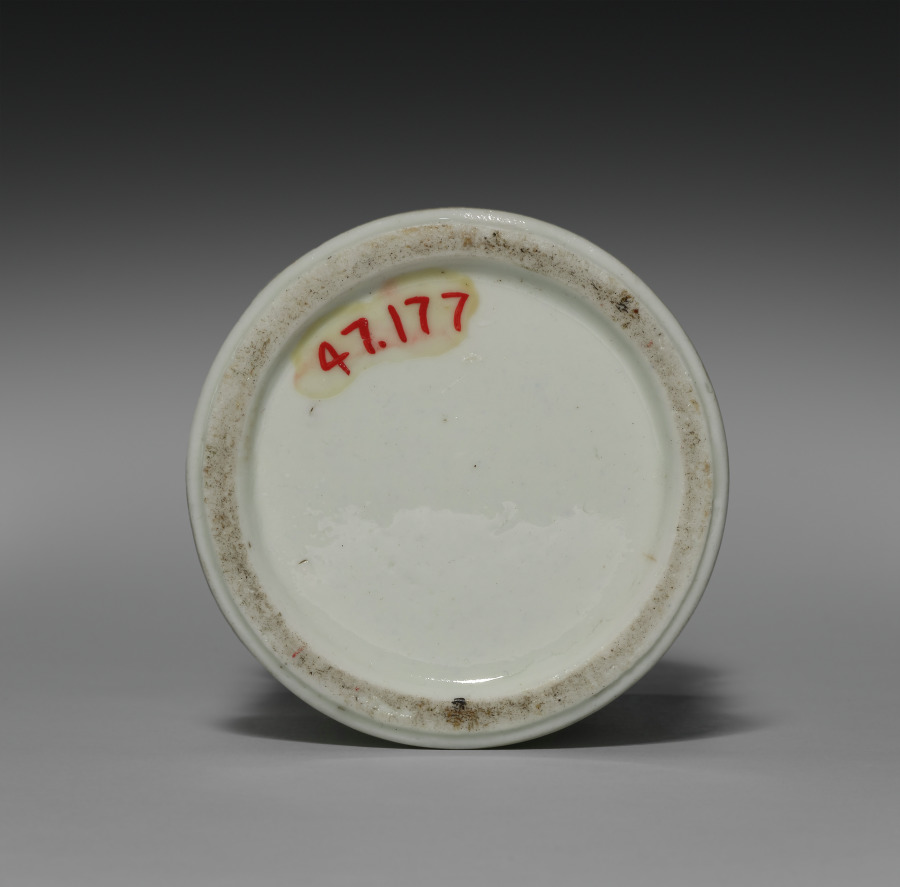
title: Sugar Caster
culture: France, Saint Cloud, 18th century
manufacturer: Saint Cloud Porcelain Factory (French)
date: c. 1732– 1738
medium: soft-paste porcelain, silver mount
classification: Ceramic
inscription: [Discharge mark of Hubert Louvet, 1732-1738 (Dog's head in profile), on both sections of silver mount]